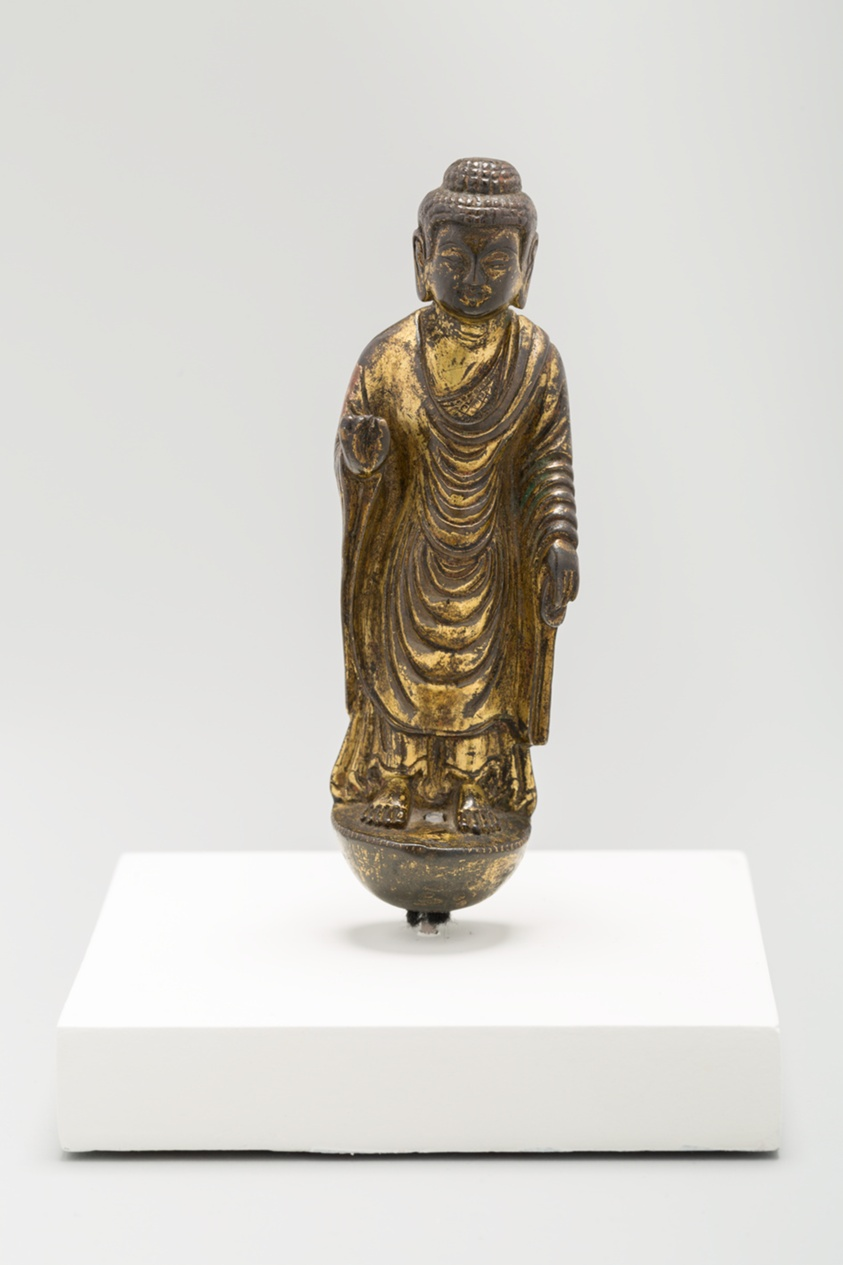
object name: Sculpture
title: Buddha, Standing with Hand in Gesture of Reassurance (Abhaymudra)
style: Chinese (culture or style)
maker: China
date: Tang dynasty, 618–907, 7th/8th century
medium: Gilt copper alloy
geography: China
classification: bronze; metal; sculpture; asian art